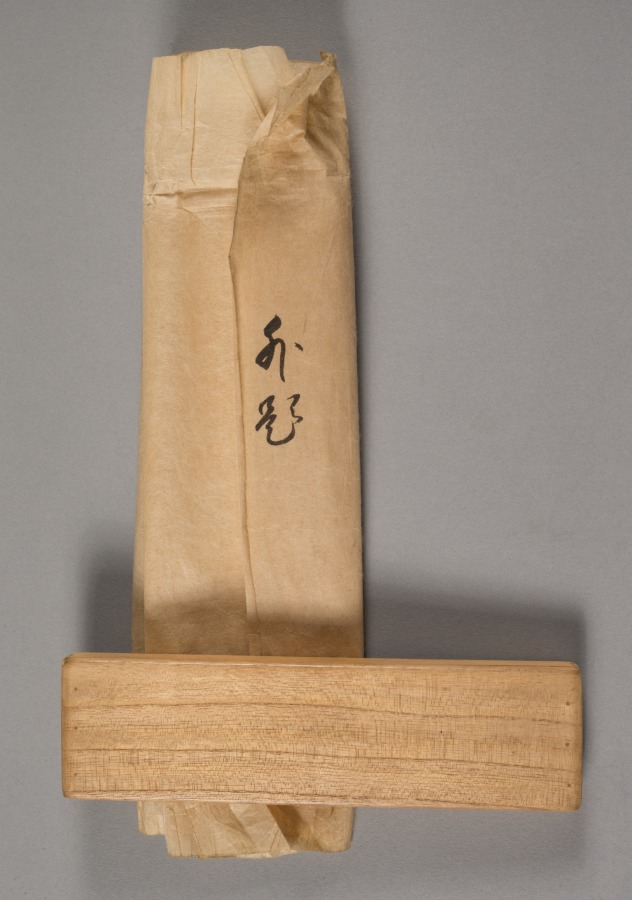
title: Crow on a Pomegranate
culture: Japan, Muromachi period (1392–1573)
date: 1500s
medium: hanging scroll; ink on paper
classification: Painting